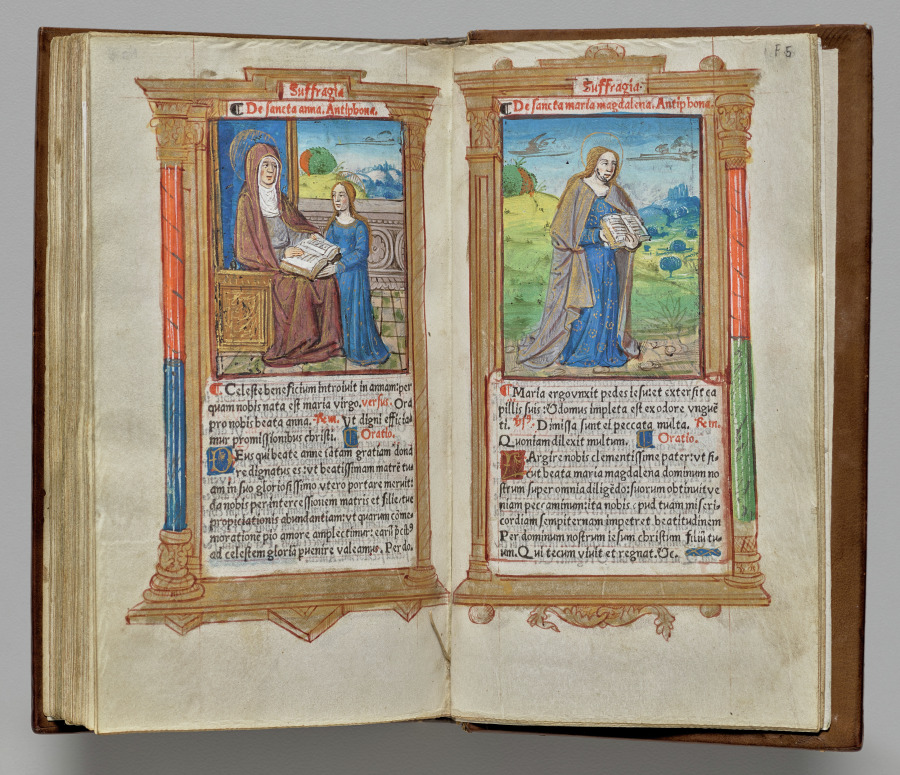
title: Printed Book of Hours (Use of Rome): fol. 108v, Saint Anne and the Virgin Mary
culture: France, Paris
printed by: Guillaume Le Rouge (French, Paris, active 1493–1517)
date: 1510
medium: 112 Printed folios on parchment, bound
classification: Bound Volume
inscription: Caeleste beneficium introivit in Annam per quam nobis nata est Maria virgo. V: Ora pro nobis beata Anna. R: Ut digni efficiamur promissionibus Christi. (Ant: A heavenly blessing entered into Anne, through whom the Virgin Mary was born for us. V: Pray for us, blessed Anne. R: That we be made worthy of the promises of Christ.) Oratio: Deus qui beatae Annae tantam gratiam donare dignatus es: ut beatissimam matrem tuam in suo gloriosissimo utero portare meruit: Da nobis per intercessionem matris et filiae tuae propitiationis abundantiam: ut quarum commemorationem pio amore amplectimur: earum precibus ad caelestem patriam pervenire valeamus. Per eundem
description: Printed books of hours were produced between 1485 and 1520. Significantly less expensive than handwritten production, printing made books of hours’ popularity soar. More than 1,775 different versions were printed during this time, allowing much customization. This hybrid version has printed text but hand-colored images and comes from Paris, a major center of book production. Open to the suffrages, indicated in red at the top, one page is devoted to Saint Anne and one to Mary Magdalene. Other versions of this book of hours have less color and attention to detail, indicating a higher price paid for this edition.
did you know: A typical book of hours contains around a dozen suffrages, also known as memorials, from the Latin memoriae.